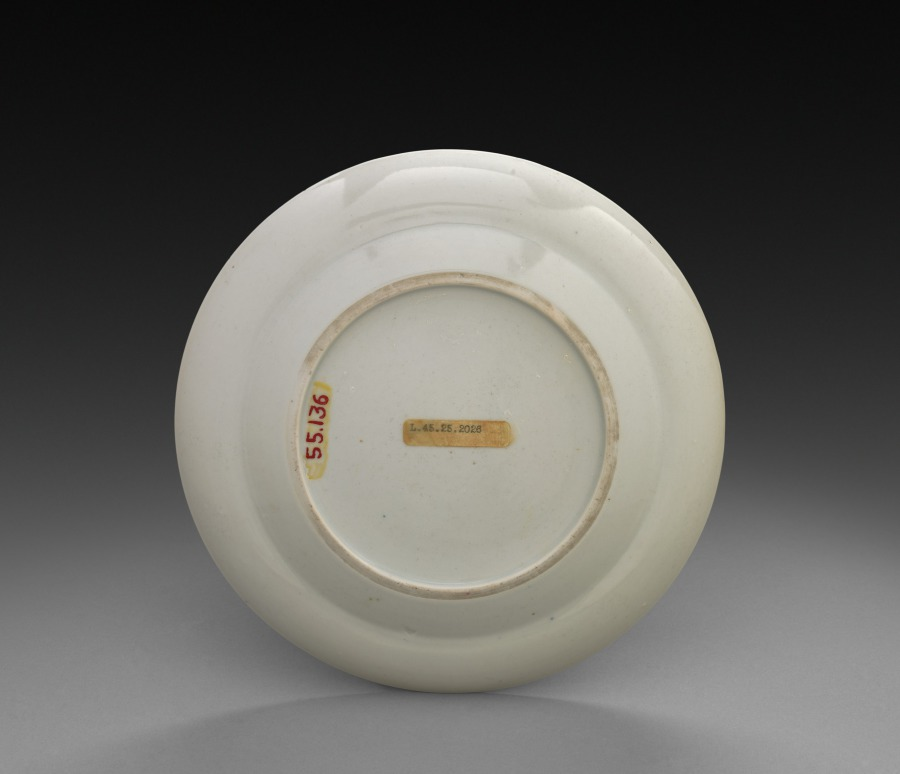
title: Plate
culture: China, Chinese Export, 18th century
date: 1785–1800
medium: porcelain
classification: Ceramic